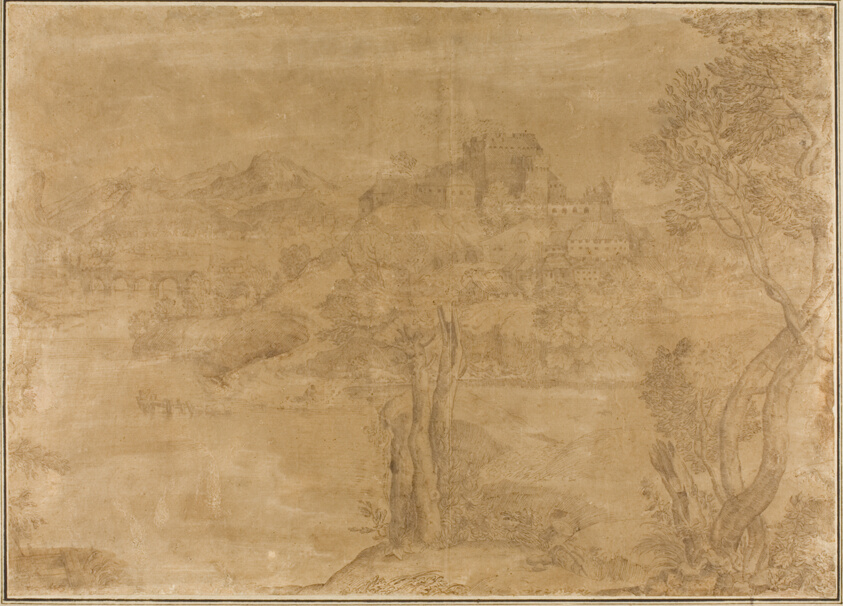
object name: Drawing and Watercolor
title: River Landscape with Castle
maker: Giovanni Francesco Grimaldi, after; Italian, 1606-1680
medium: Pen and brown ink, with graphite, on cream laid paper, prepared with brown wash, laid down on tan wove paper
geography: Italy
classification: pen and ink drawings; drawings (visual works); prints and drawing